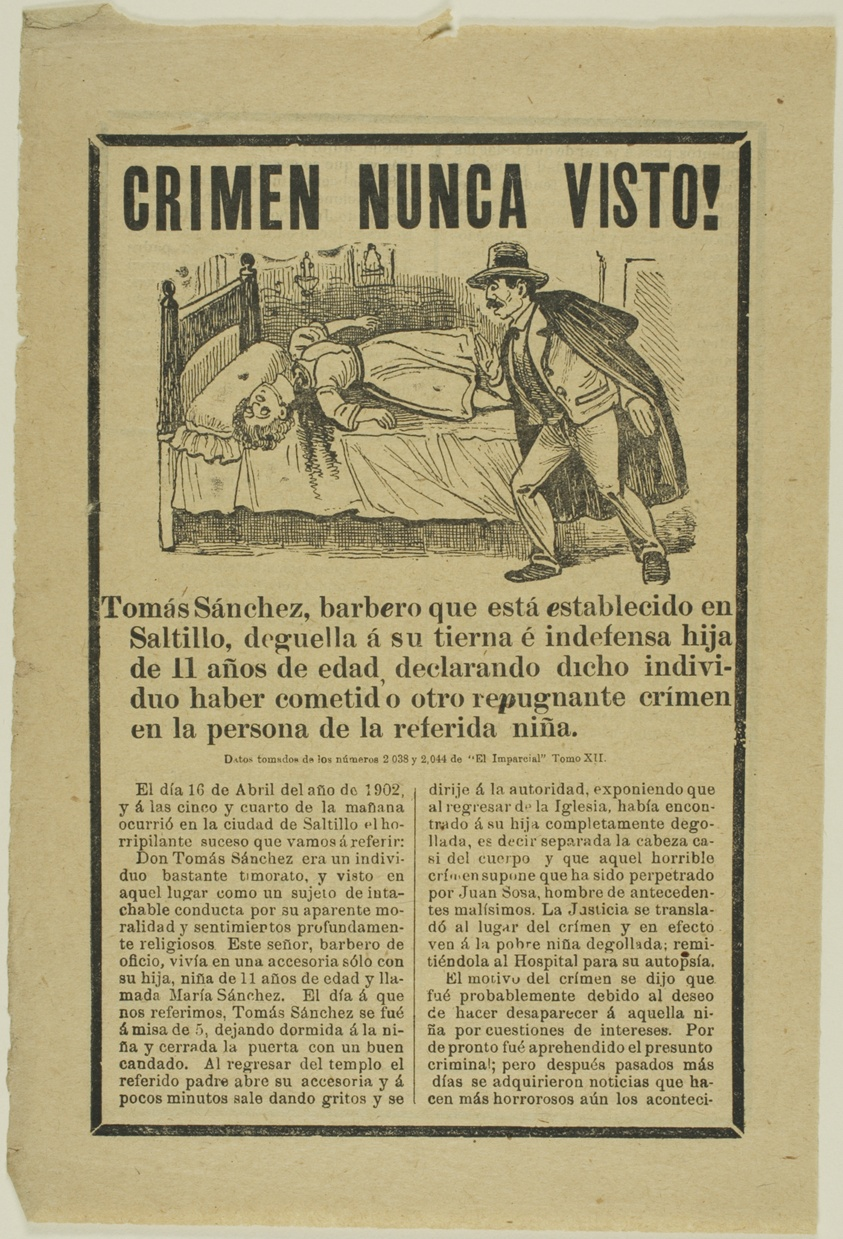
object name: Print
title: Crime Never Before Seen!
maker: José Guadalupe Posada (Mexican, 1852-1913)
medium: Relief etching on paper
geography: Mexico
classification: relief etching; print; prints and drawing